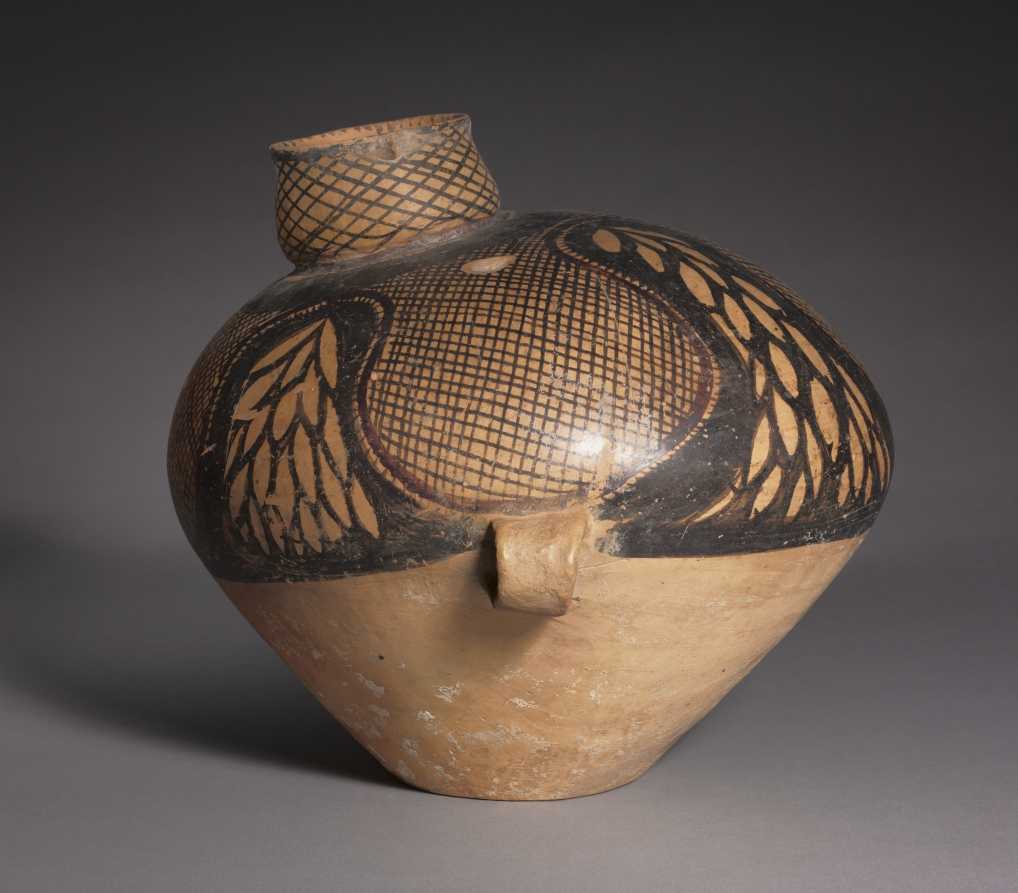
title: Bird-shaped Urn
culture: Northwest China, Neolithic period, Majiayao culture, Banshan phase (2650–2350 BCE)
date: 2650–2350 BCE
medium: earthenware with slip-painted decoration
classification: Ceramic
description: An imaginative shape and abstract curvilinear patterns lend delightful charm to this functional jar. Its fine-grained body has a light reddish color due to the iron content in the clay, achieved by ensuring abundant air in the kiln during the firing. The surfaces were burnished before applying the painted decoration in black and red.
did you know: This abstract vessel may be imagined as a bird with feathers painted on the body.